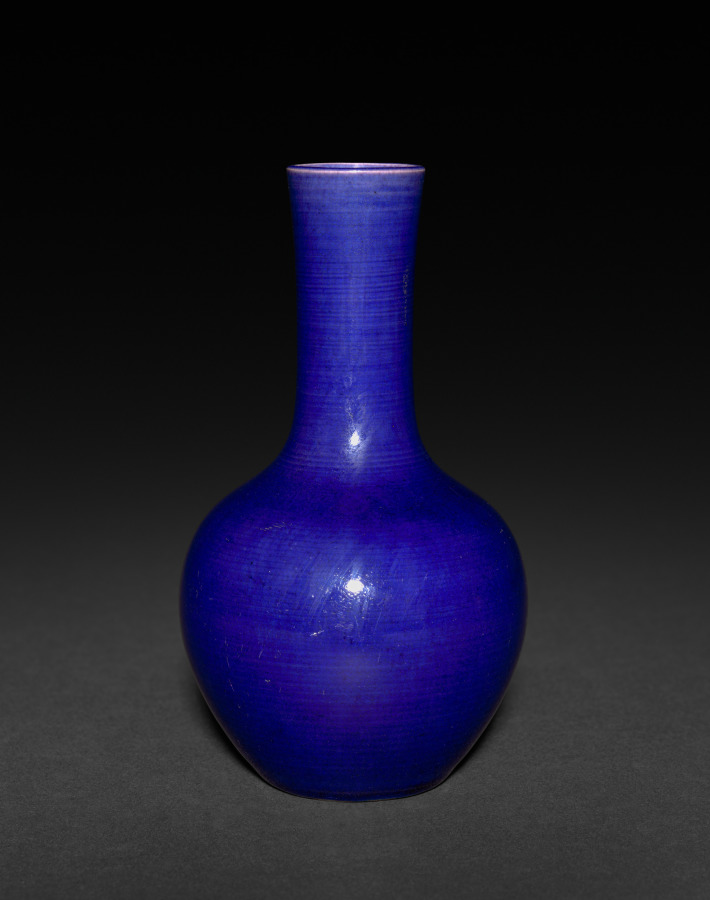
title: Bottle-Shaped Vase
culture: China, Qing dynasty (1644–1911), Qianlong reign (1736–95)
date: 1736–95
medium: porcelain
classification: Ceramic